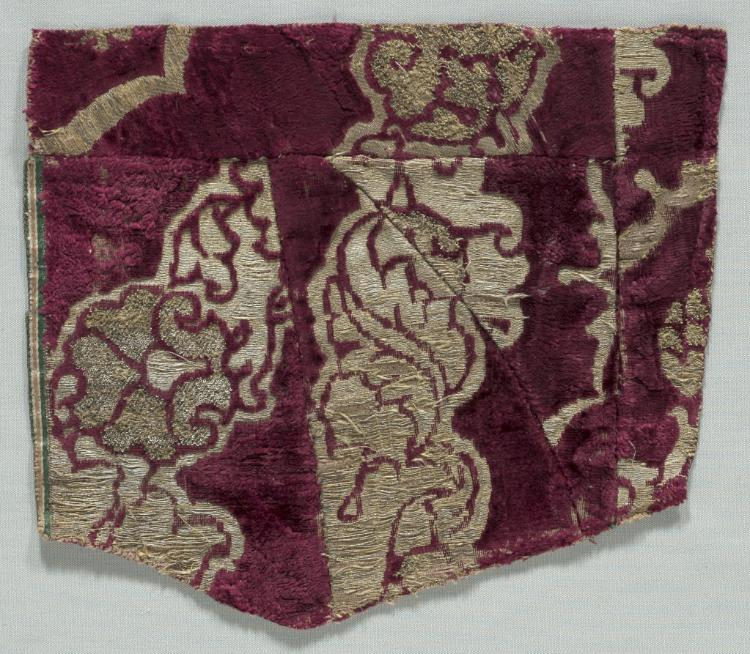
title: Velvet Fragment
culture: Italy, 15th century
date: 1400s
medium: velvet (cut, voided, and brocaded)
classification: Velvet